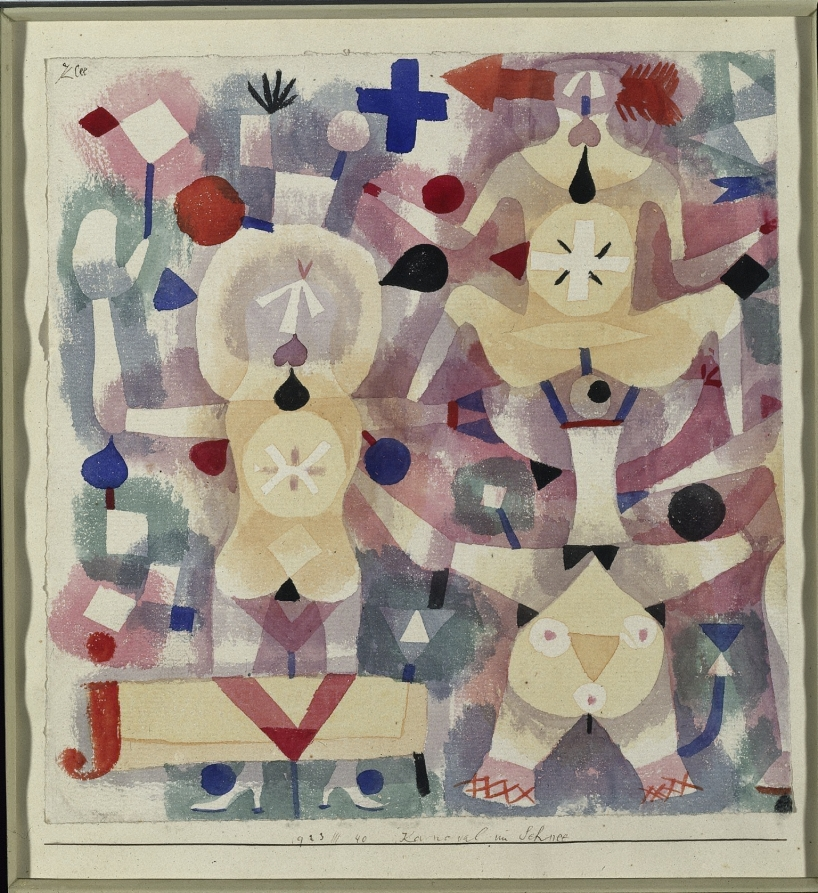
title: Carnival in the Snow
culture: Germany, 20th century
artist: Paul Klee (German, 1879–1940)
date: 1923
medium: watercolor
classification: Drawing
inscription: signed, upper left, in brown ink: Klee ; SECONDARY SUPPORT, by artist, lower center, in brown ink: 1923 /// 40 Karneval im Schnee [slashes part of inscription]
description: In this watercolor, acrobats and circus jugglers emerge from a complex pattern of shapes and colors. Two jugglers share a face and torso. A member of Der Blaue Reiter group in Munich, Paul Klee believed that the elements of color and shape alone could carry connotations of emotions, moods, and subjective feelings. His method was to begin painting without a subject, only settling upon something that could be recognized after layering colored form upon colored form.